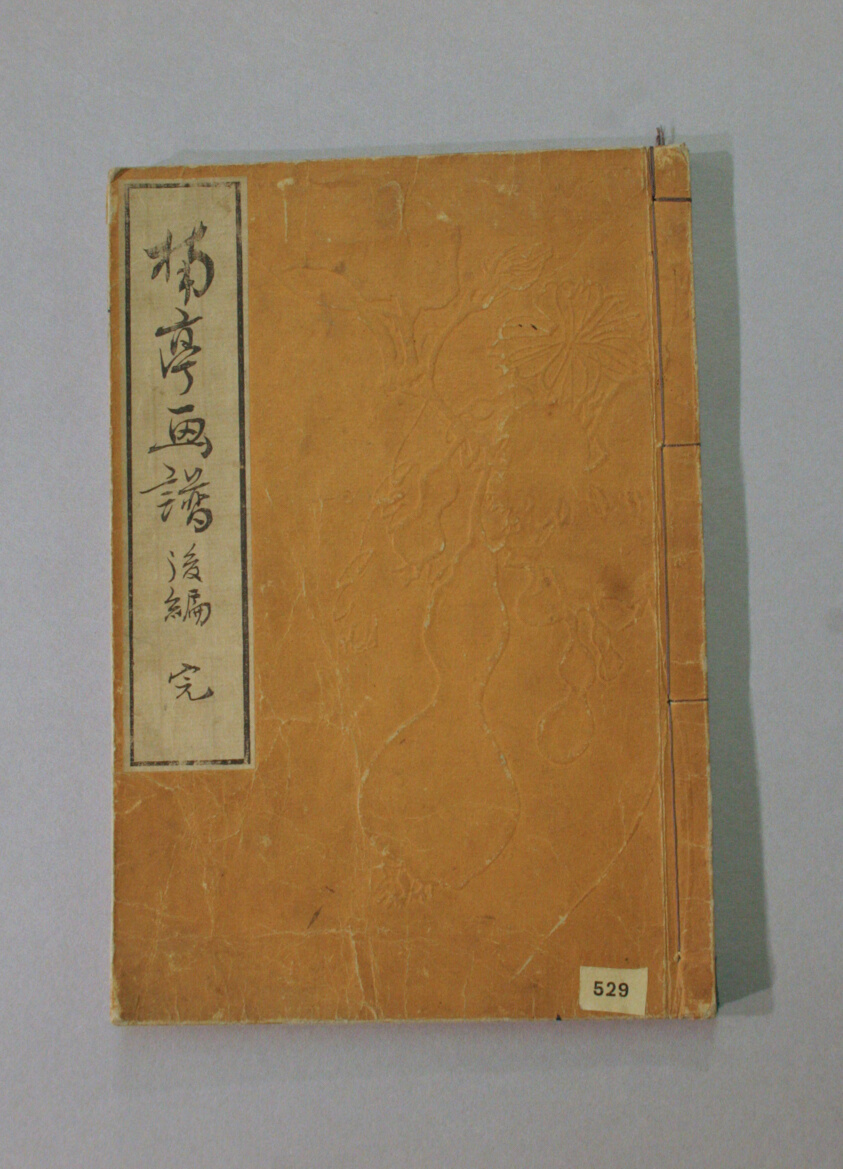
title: Nantei gafu kohen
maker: Nantei Nishimura (Japanese, 1775-1834)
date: 1826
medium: Woodblock printed book, one volume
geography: Japan